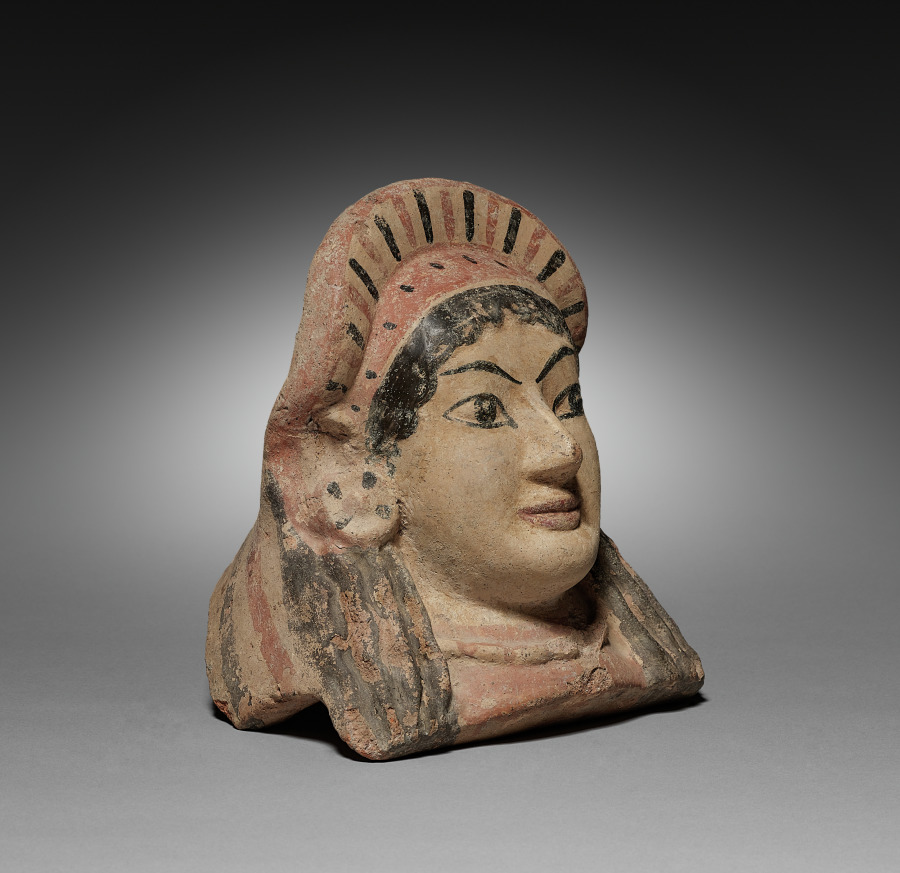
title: Antefix in the Form of a Maiden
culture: Etruscan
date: late 500s–early 400s BCE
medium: Painted terracotta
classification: Sculpture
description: Staring out with almond-shaped eyes and enigmatic smile, this brightly painted female head hides a rounded back made to serve an important function. She is a molded terracotta antefix, made to cap an open-ended roof tile along the sloping edge of a wooden building. Depending on the size of the structure it adorned, this antefix may have sat alongside dozens of others, likely all similar in form and painted decoration, and perhaps accompanied by additional polychrome architectural sculpture. Sometimes identified as maenads, the female followers of Dionysos (Etruscan Fufluns), such figures might also be nymphs or anonymous maidens.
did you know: Much Etruscan architectural sculpture was molded terracotta rather than carved stone.